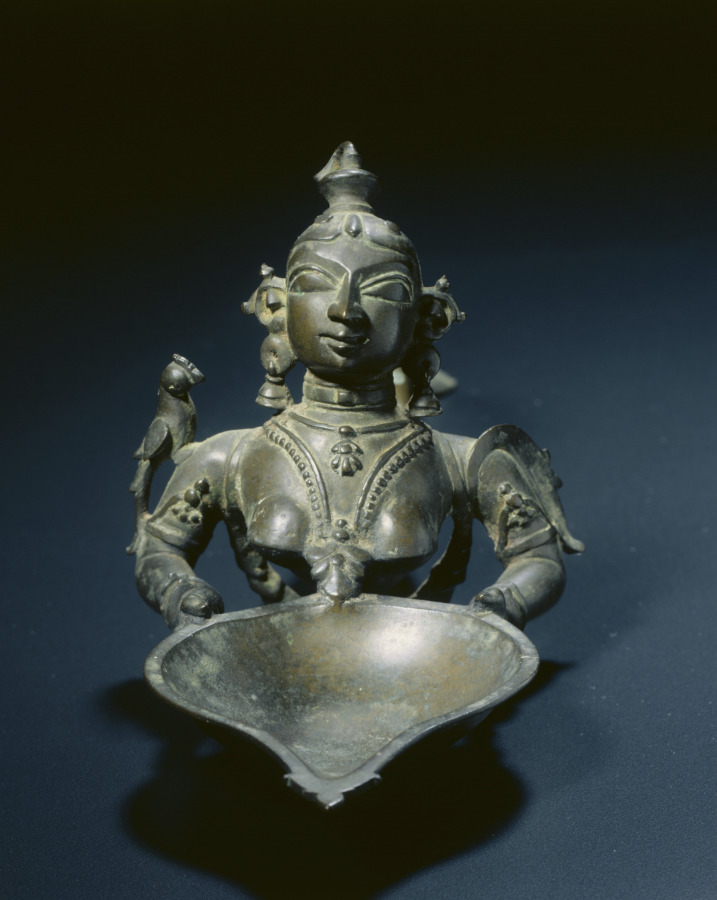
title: Votive Lamp (Deepa Lakshmi)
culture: South India, Chingleput district (Madras), 18th-19th Century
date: 1700s-1800s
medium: bronze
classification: Sculpture